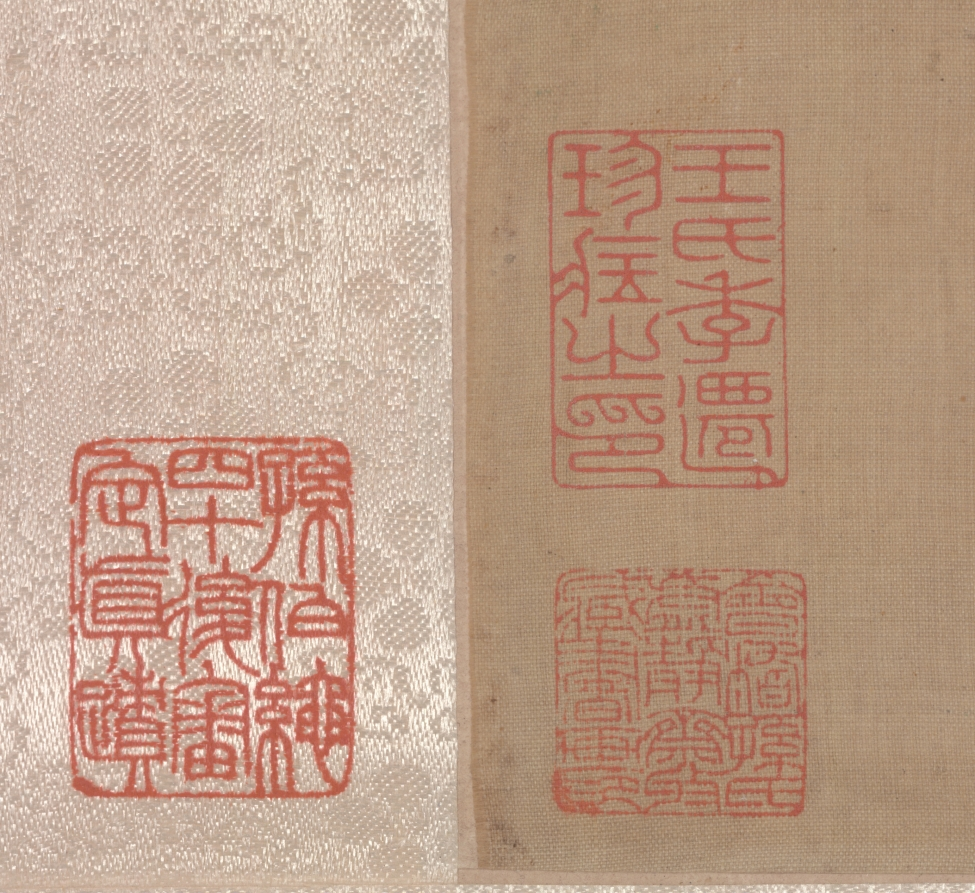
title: Lady Xuanwen Giving Instruction on the Rites of Zhou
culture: China, Ming dynasty (1368–1644)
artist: Chen Hongshou (Chinese, 1598/99–1652)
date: 1638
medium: Hanging scroll; ink and color on silk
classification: Painting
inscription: 宣文君者韋逞母宋氏也。父授以周官音義，曰：吾家世學傳周官。傳業相繼。此又周公所製，經紀〔典〕誥百官品物備於此矣。女可受之。君諷誦不輟。石帝徙山東。君乃推鹿車，背負父所授書到冀州。逞時年少。晝則採樵，夜則教逞。逞遂學成名立。仕符堅為太常。堅常幸其太學，問博士經典。乃憫禮樂遺缺。時博士盧壺對曰：廢學既久，書傳零落。比年綴撰，正經粗集。惟周官、禮經，未有其師。竊見太常韋逞母宋氏世學家，女傳其父業。得周官音義。今年八十。視聽無闕。非此母無可傳授後生。于是就宋氏家立講堂，置生員百二十人。隔絳紗縵而授業焉。拜宋氏爵，號為宣文君。賜侍婢十人。周官學後行于世。 崇禎戊寅八月二日，為綬姑六旬之辰。綬弟自成為姑偦。偕姑季女駱密、外孫楹、楠、楩、橒、楞、棅、孫女惠、漉酒上壽，屬綬圖寫，所以頌祝者。綬思宋母尚五胡之時，經藉屬之婦人；今太平有象，而秉杖名義者，獨綬姑爾。敬寫此圖，且厚望于弟紹焉。猶子洪綬九頓首。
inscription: 5 additional seals: 2 of Xu Weiren 徐渭仁(1788－1855); 2 of Sun Zutong 孫祖同 (1894–1937); 1 of C. C. Wang 王季遷 (1907–2003).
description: This painting by Chen Hongshou depicts the story of Xuanwen Jun, or Lady of Literary Propagation, at a venerable age, instructing young scholars on the Confucian classics. It was painted for Chen’s aunt in celebration of her 60th birthday. Chen’s painting style is archaic in the use of fine outlines and brilliant coloring with mineral pigments. In depicting the figures, he uses the “iron-wire” brush style (fine, even lines) with deliberate control. The faces are elongated and exaggerated. A few ritual bronzes lend the scene an antique flavor.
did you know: Chen Hongshou's long inscription at the top of the painting compares his virtuous aunt with the historical exemplar, Lady Xuanwen.